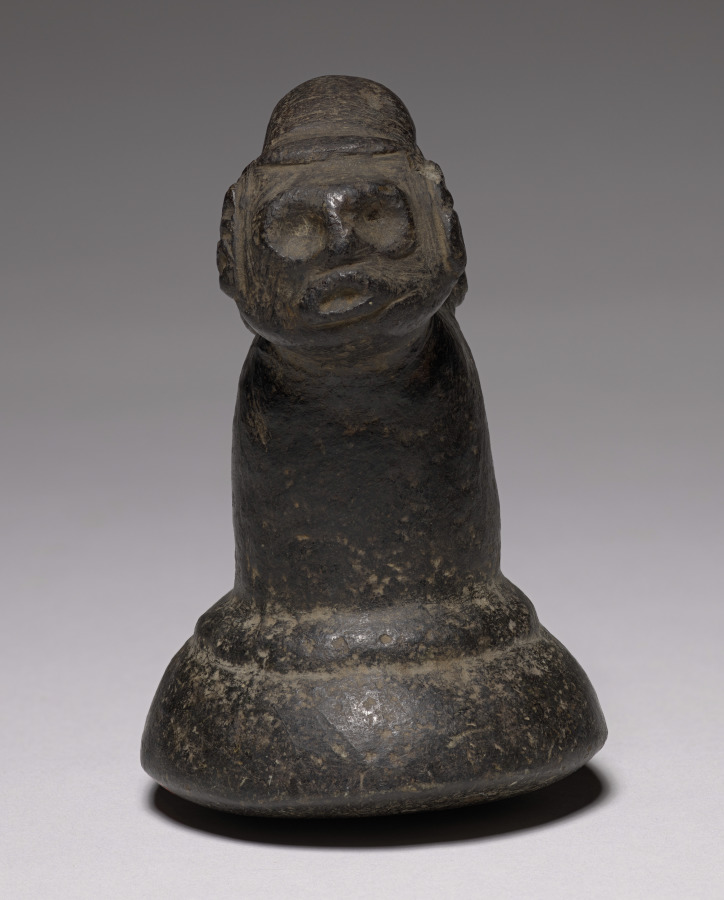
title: Pestle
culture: West Indies, Arawak (?), 15th century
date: 1400s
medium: stone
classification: Sculpture